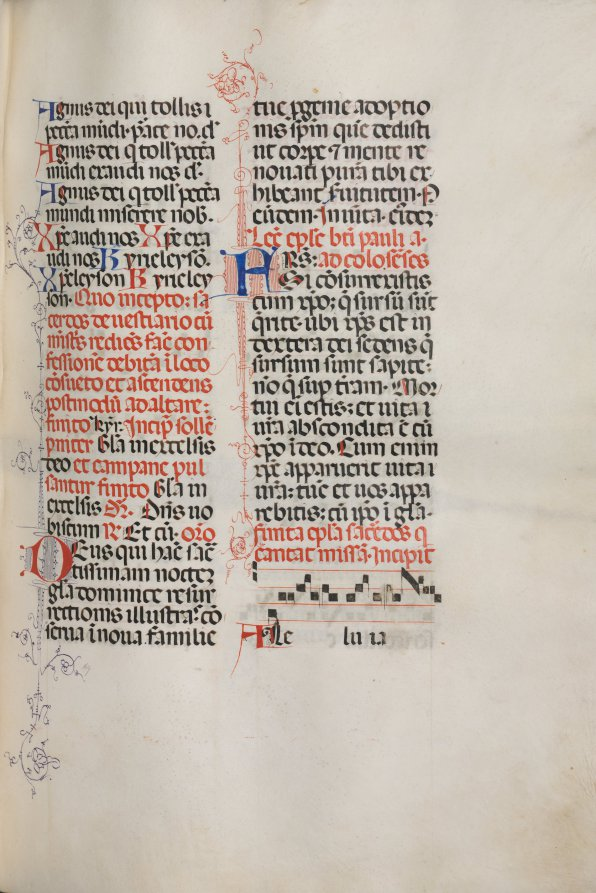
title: Missale: Fol. 171: Music for "Alleluia" etc. at beginning of Easter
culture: Italy, Perugia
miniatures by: Bartolommeo Caporali (Italian, c. 1420–1503)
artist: assisted by Giapeco Caporali (Italian, d. 1478)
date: 1469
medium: ink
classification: Bound Volume